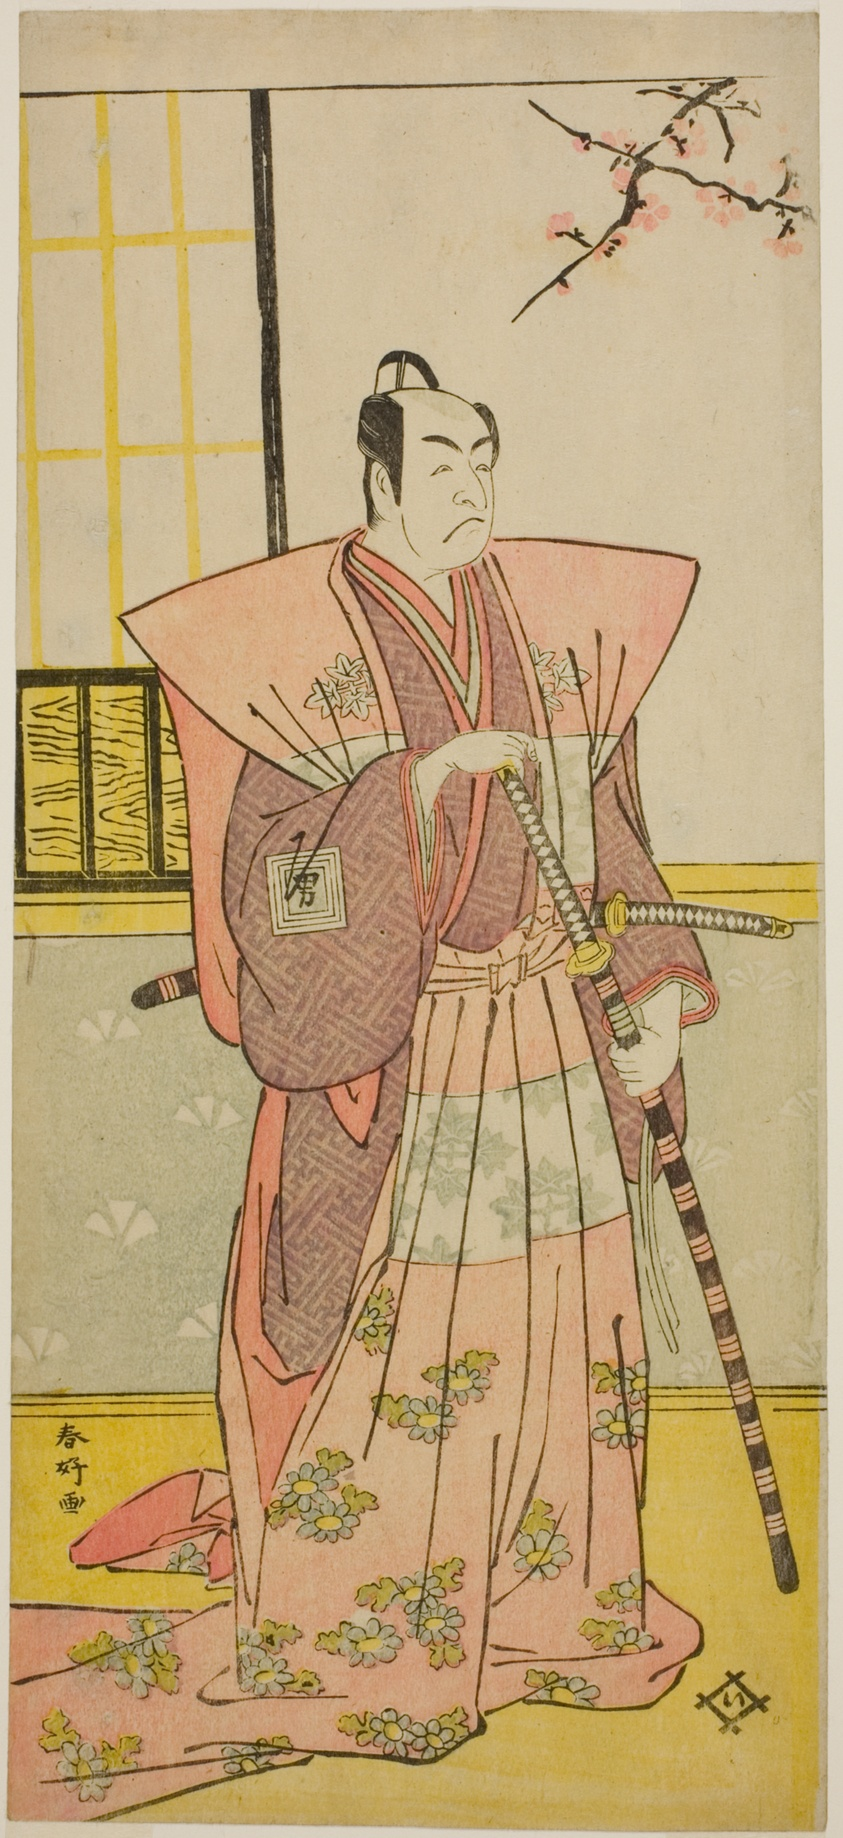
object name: Print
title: The Actor Ichikawa Omezo I as Koyurugi Motomenosuke (?) in the Play Haru no Nishiki Date-zome Soga (?), Performed at the Nakamura Theater (?) in the First Month, 1790 (?)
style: Japanese (culture or style)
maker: Katsukawa Shunko I; Japanese, 1743-1812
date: c. 1790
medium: Color woodblock print; hosoban; left sheet of diptych (?)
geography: Japan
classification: woodblock print; print; asian art